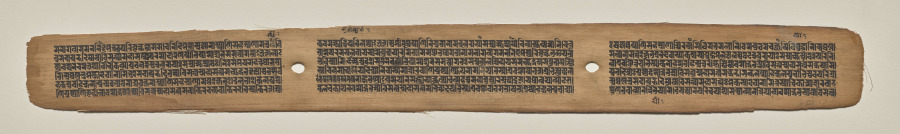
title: Text, folio 183 (recto), from a Manuscript of the Perfection of Wisdom in Eight Thousand Lines (Ashtasahasrika Prajnaparamita-sutra)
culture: Eastern India, Bihar, Vikramashila Monastery. Painting: Nepal, Kathmandu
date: Sunday, September 14, 1119 (year 239 of the Newar Samvat in the month of Ashvina)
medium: gum tempera and ink on palm leaves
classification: Painting